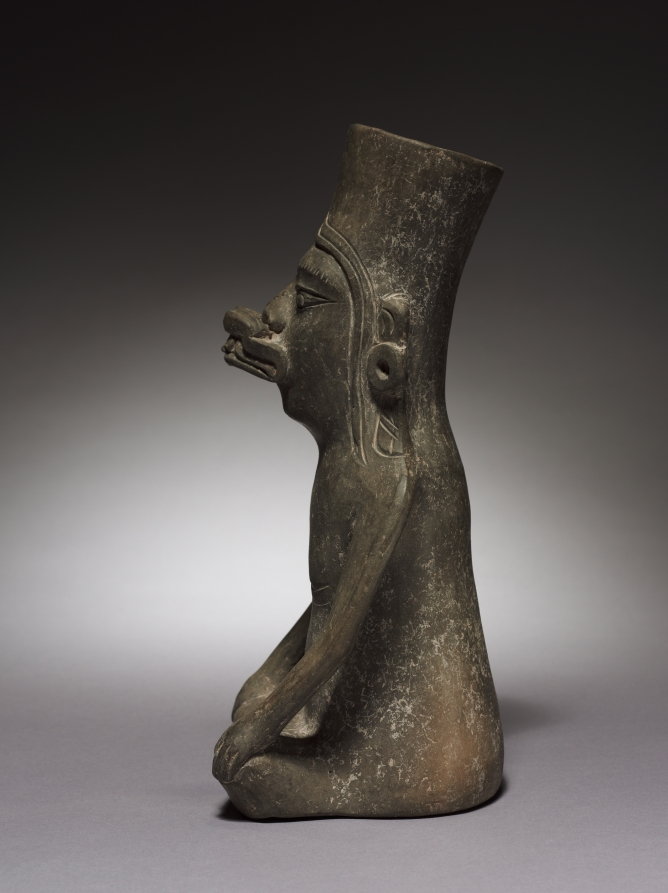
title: Urn Figure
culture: Mexico, Oaxaca, Zapotec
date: c. 150 BCE–200 CE (thermoluminescence date, 60 BCE–642 CE)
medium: earthenware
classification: Sculpture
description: This simply posed and costumed urn figure represents a goddess, or perhaps an ancestress. Early Zapotec ceramic art has a spare elegance that contrasts strongly with the florid ornamentation of later works.